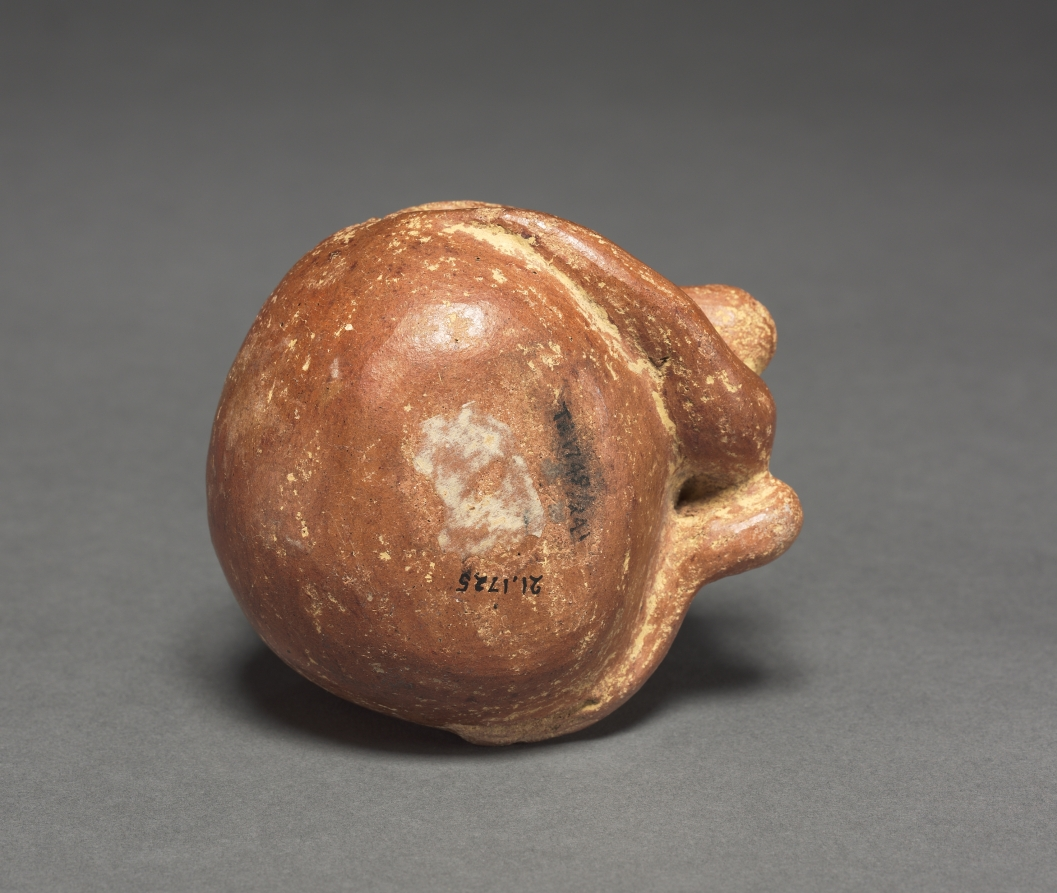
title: Chameleon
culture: Colombia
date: before 1921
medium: red ware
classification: Ceramic